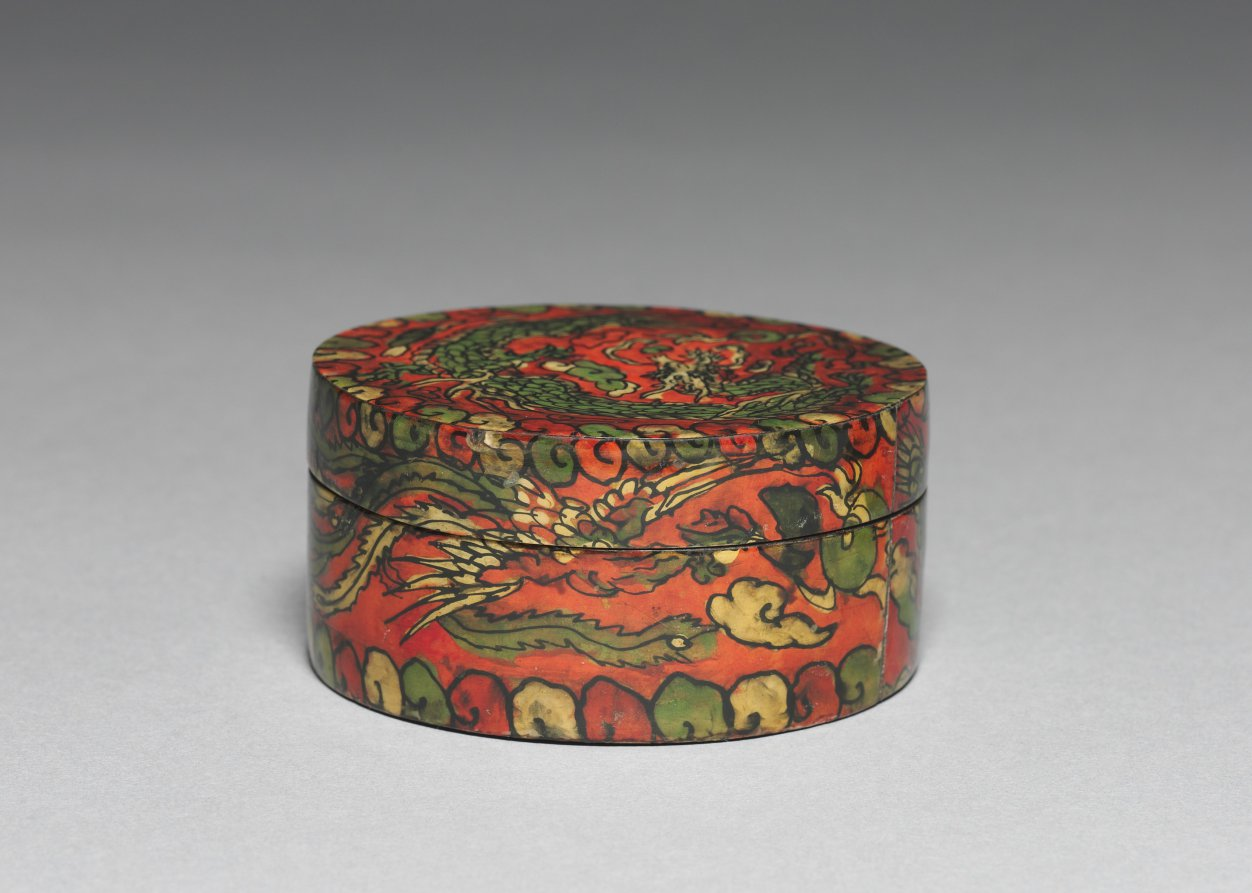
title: Incense Box with Dragon Design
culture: Korea, Joseon dynasty (1392–1910)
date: 1900s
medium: Painted wood with flattened ox-horn inlay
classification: Miscellaneous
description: This incense box is colorfully decorated with the technique of oxhorn plating. The oxhorn was cut, soaked in water, boiled, and then pressed into thin translucent sheets. Since oxhorns are usually rather small, dozens of them were required to fully decorate even a small wooden object. The lid of this container is colorfully illustrated with the imagery of a dragon amid clouds deemed as an auspicious symbol, and its side presents flying dragon and phoenix following one after another.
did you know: This box is made of small flattened pieces of oxhorn. Since oxhorn is rather small, possibly dozens of them were used to fully decorate even a small wooden object like this box.